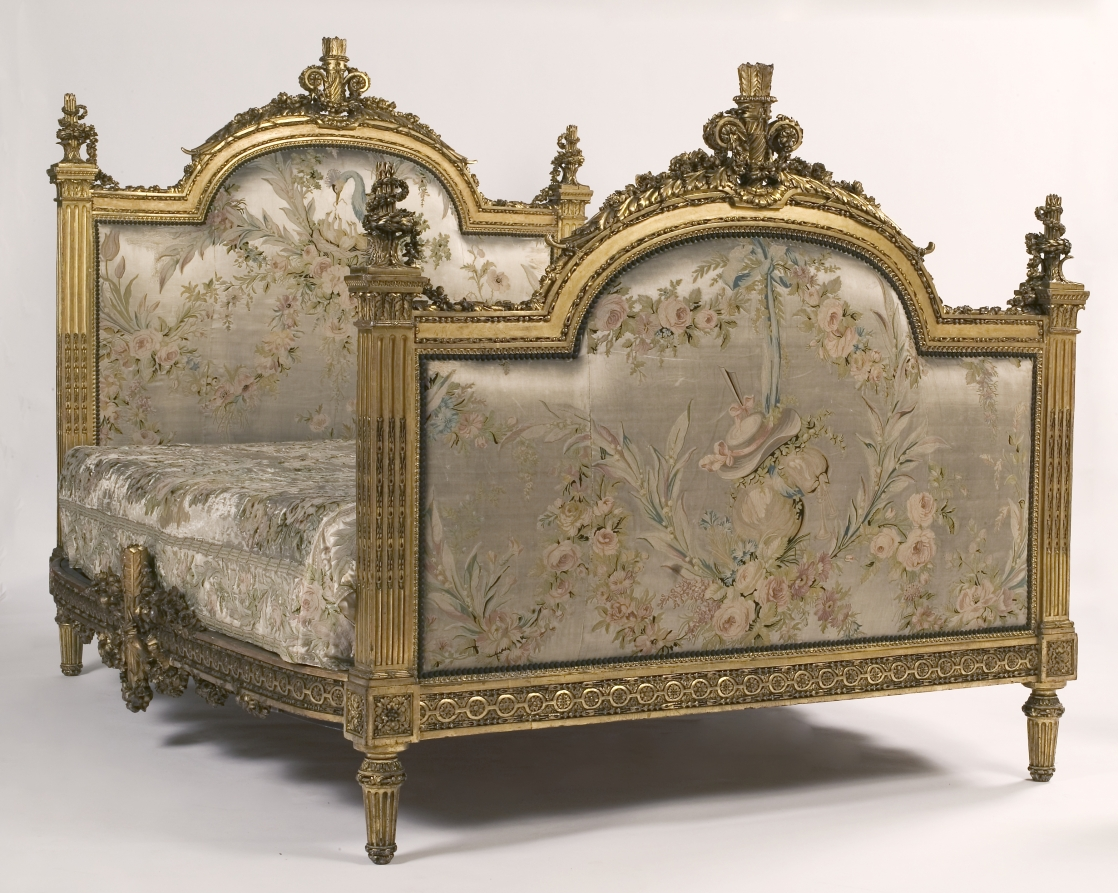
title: Bed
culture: France, 18th century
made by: attributed to Georges Jacob (French, 1739–1814)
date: 1700s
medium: gilded wood and embroidered satin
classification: Furniture and woodwork